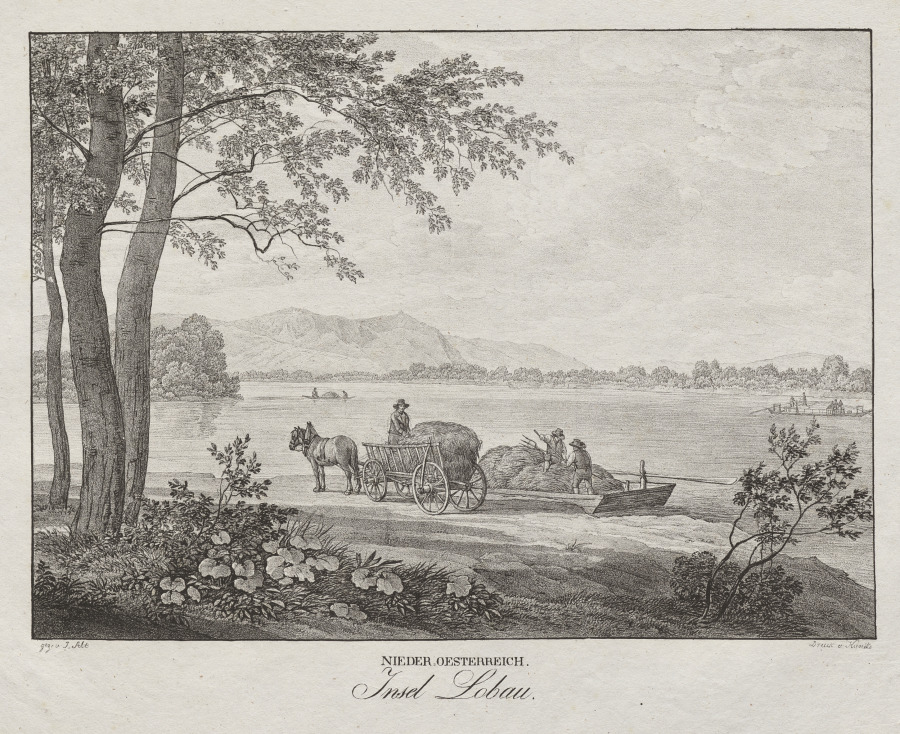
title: Nieder-oesterreich, Insel Lobau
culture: Austria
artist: Jakob Alt (Austrian, 1789–1872)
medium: lithograph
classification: Print